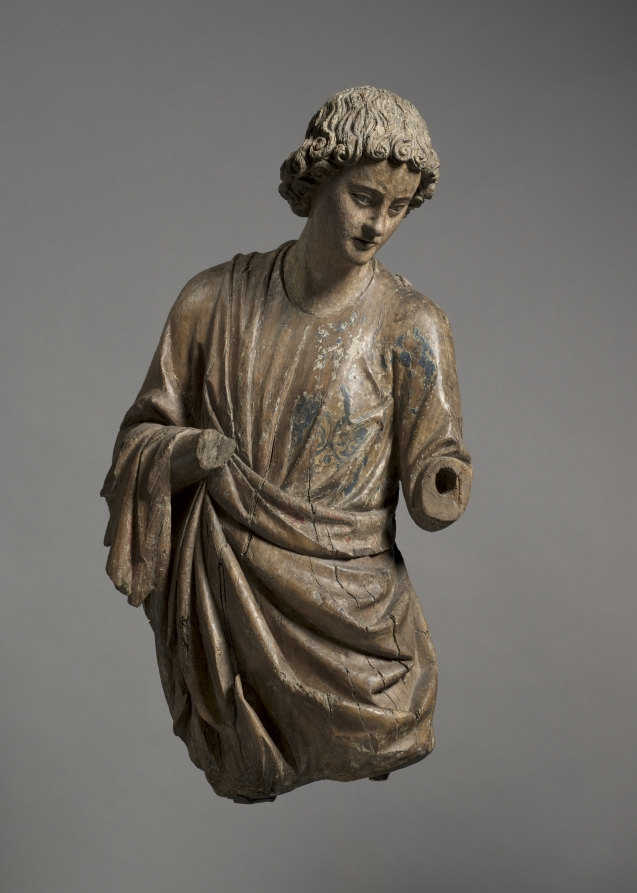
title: Angel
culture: France, vicinity of Reims, 13th century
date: c. 1250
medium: walnut with traces of gilding and polychromy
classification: Sculpture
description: Surviving in fragmentary condition, this pair of angels lacks lower arms, hands, wings, and attributes. Their original paint and gilding, now almost entirely lost, once rendered their garments a rich brocade and their hair a luxuriant gold. Nonetheless, in their graceful poses and sublime faces—which may portray tragic interest, anguish, or deep concern—their original delicacy and power are still evident. They embody the monumental style of 13th-century High Gothic cathedral sculpture in France. Their style specifically suggests they were carved in or around Reims, possibly by sculptors associated with the cathedral there. Their original placement is unknown, but they may have flanked an altar on columns.